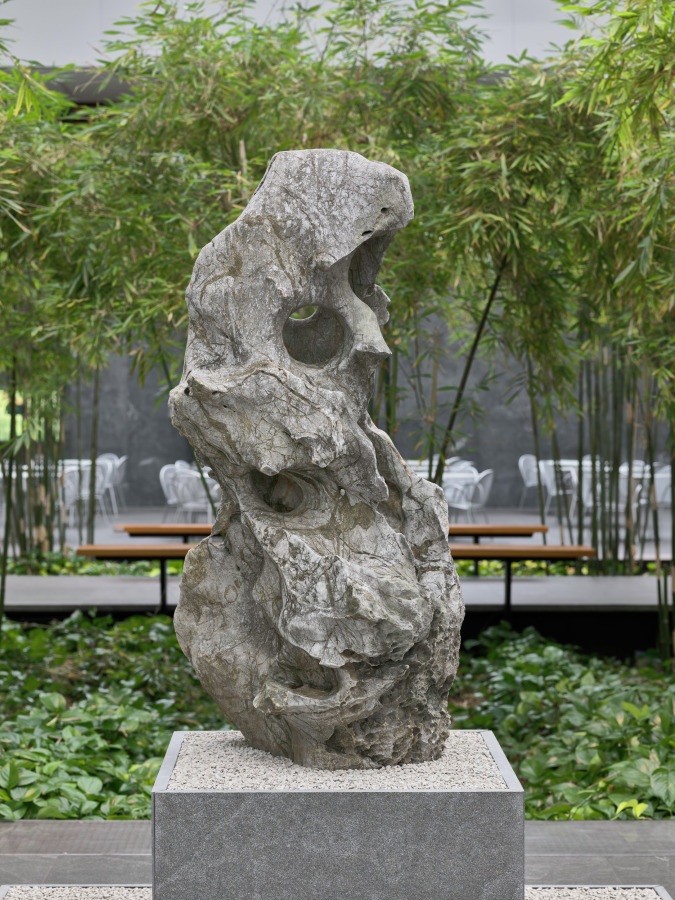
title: Taihu Garden Stone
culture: China, Jiangsu province, Wuxi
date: 0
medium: Limestone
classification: Stone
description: In China, rocks are considered elements of nature that possess spirit and life energy. With its upward winding masses, perforations, weathered surface, and multiple viewpoints, the stone exhibits sculptural qualities and embodies constant transformation through natural forces and human intervention. A solid piece of rock, it was originally sourced from the Lake Tai region. Stones were collected, set up in gardens, or installed on scholar’s desks as miniature mountains. Traditionally, Taihu stones were the most desirable type of rock. This stone is a gift by the contemporary artist Liu Dan, known for his depictions of rocks, who calls them "the stem cells of Chinese landscape."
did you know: The donor, Liu Dan, is the most prominent and celebrated painter of rocks in contemporary China.